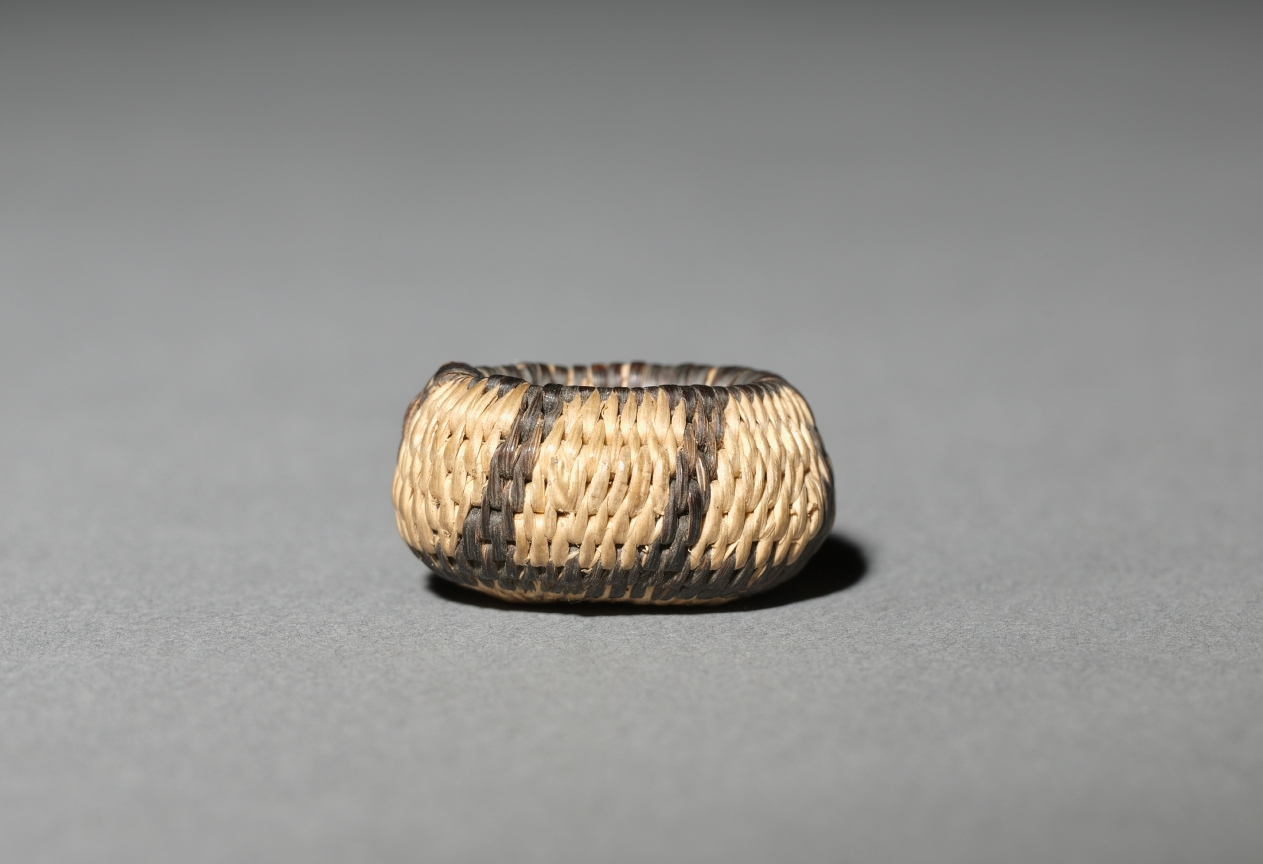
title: Miniature Rhomboidal Basket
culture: California, Pomo, 20th century (?)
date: Early 1900s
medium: coiled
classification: Basketry